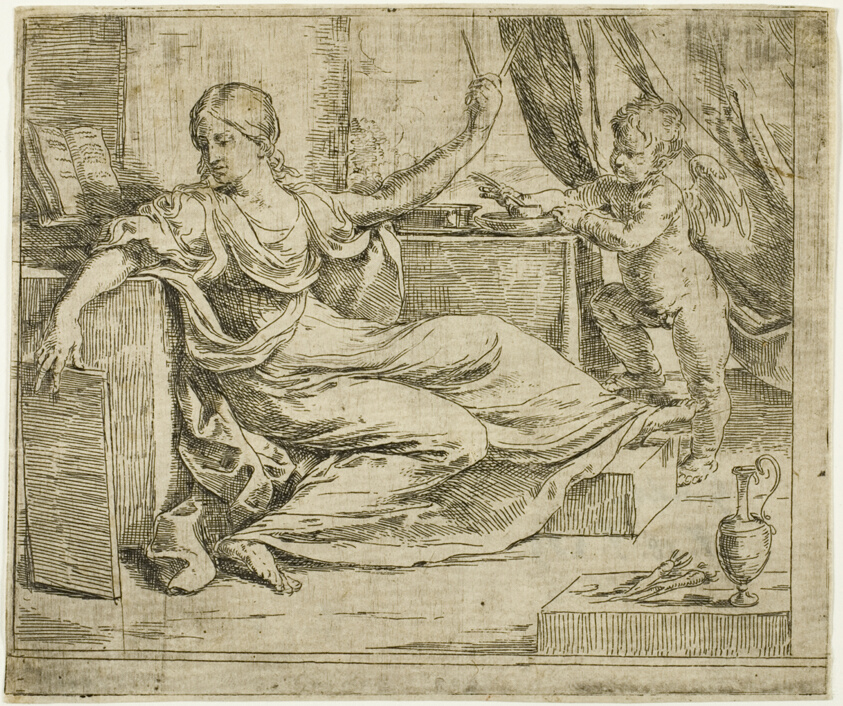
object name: Print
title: Science or The Love of Study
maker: Guido Reni (Italian, 1575-1642)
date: c. 1635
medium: Etching on ivory laid paper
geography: Italy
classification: etching; print; prints and drawing